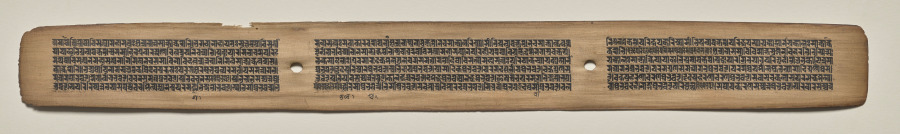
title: Text, Folio 130 (recto), from a Manuscript of the Perfection of Wisdom in Eight Thousand Lines (Ashtasahasrika Prajnaparamita-sutra)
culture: Eastern India, Bihar, Vikramashila Monastery. Painting: Nepal, Kathmandu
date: Sunday, September 14, 1119 (year 239 of the Newar Samvat in the month of Ashvina)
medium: gum tempera and ink on palm leaves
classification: Painting